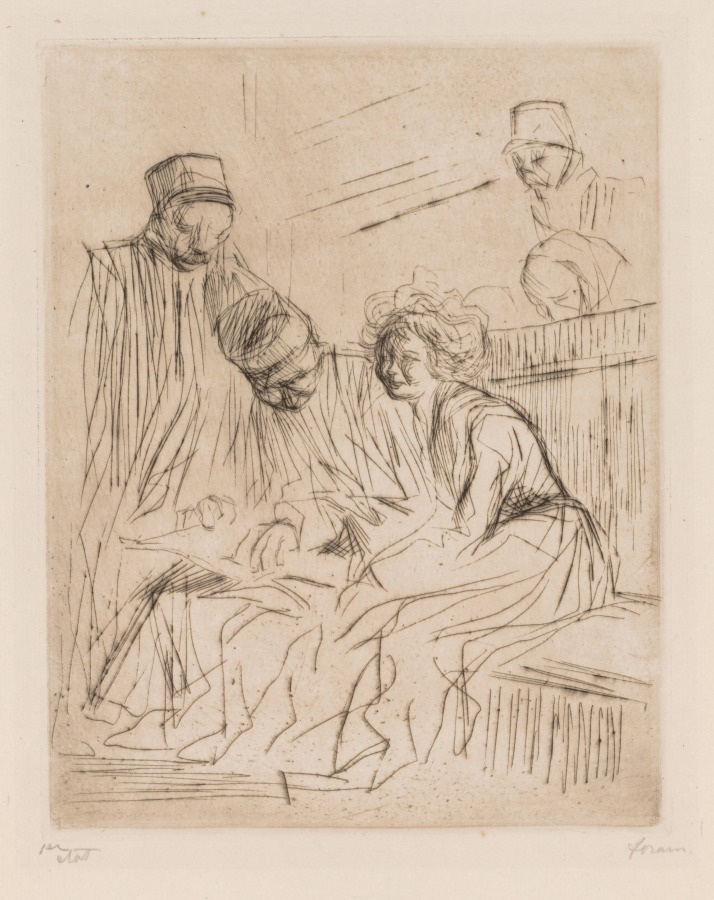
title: Reading of the Barrister's Brief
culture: France, 19th-20th century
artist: Jean Louis Forain (French, 1852–1931)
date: 1909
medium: etching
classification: Print